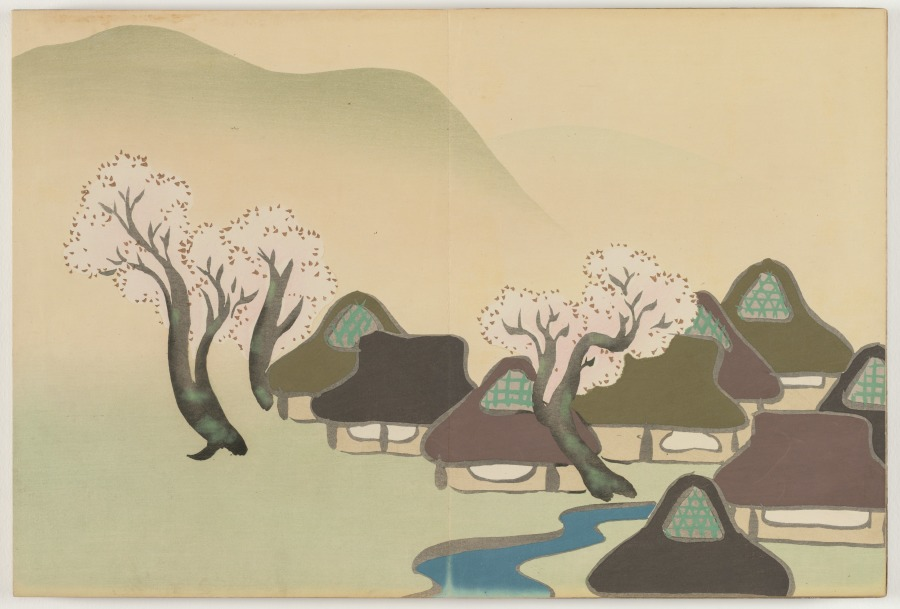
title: Flowers of a Hundred Worlds (Momoyogusa): Farming Village in Spring (Harudenka)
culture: Japan, Meiji period (1868–1912)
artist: Kamisaka Sekka (Japanese, 1866–1942)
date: 1909–10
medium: color woodcuts with gold and silver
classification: Bound Volume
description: This print from a set of three woodblock printed albums displays the graphic design prowess of Kamisaka Sekka. The images were first distributed one by one to subscribers to the series but later were reissued in bound form, like this book, for mass consumers. Each print features a vignette taken from nature or Japanese literature. Many of the scenes have a long history in Japan, originating in the 900s or 1000s and having been interpreted by all manner of artists since that time. Sekka’s selections hew closely to precedents from the Rinpa style originated by painter Tawaraya Sōtatsu (c. 1570–c. 1640) and calligrapher Hon’ami Kōetsu (1558–1637).